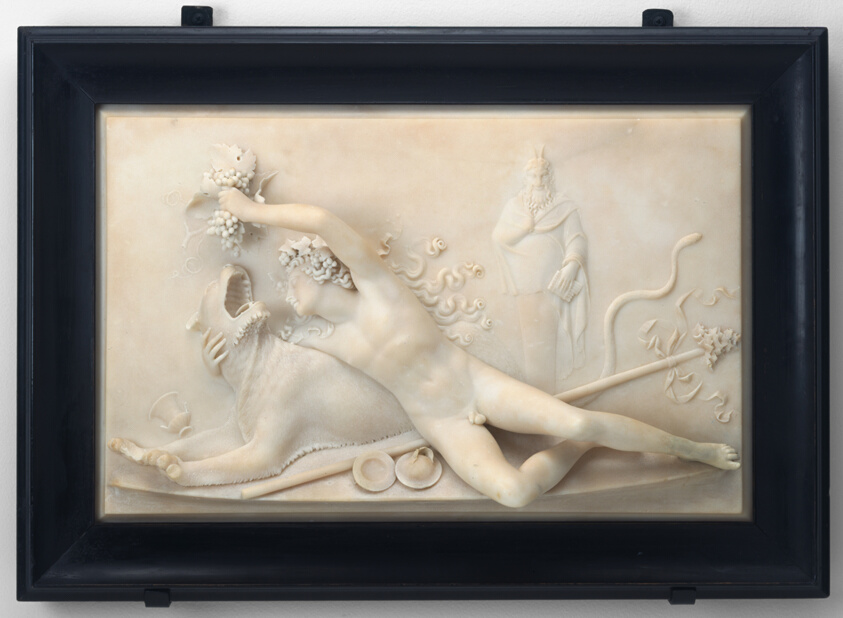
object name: Sculpture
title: Bacchus Feeding a Panther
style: 18th Century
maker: John Deare (English, 1759–1798)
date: 1792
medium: Marble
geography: England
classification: relief; british; sculpture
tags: Greek gods, vines, nudes, mythology, mythological figures, mythical, man, grapes, food, foliage, cup, animals